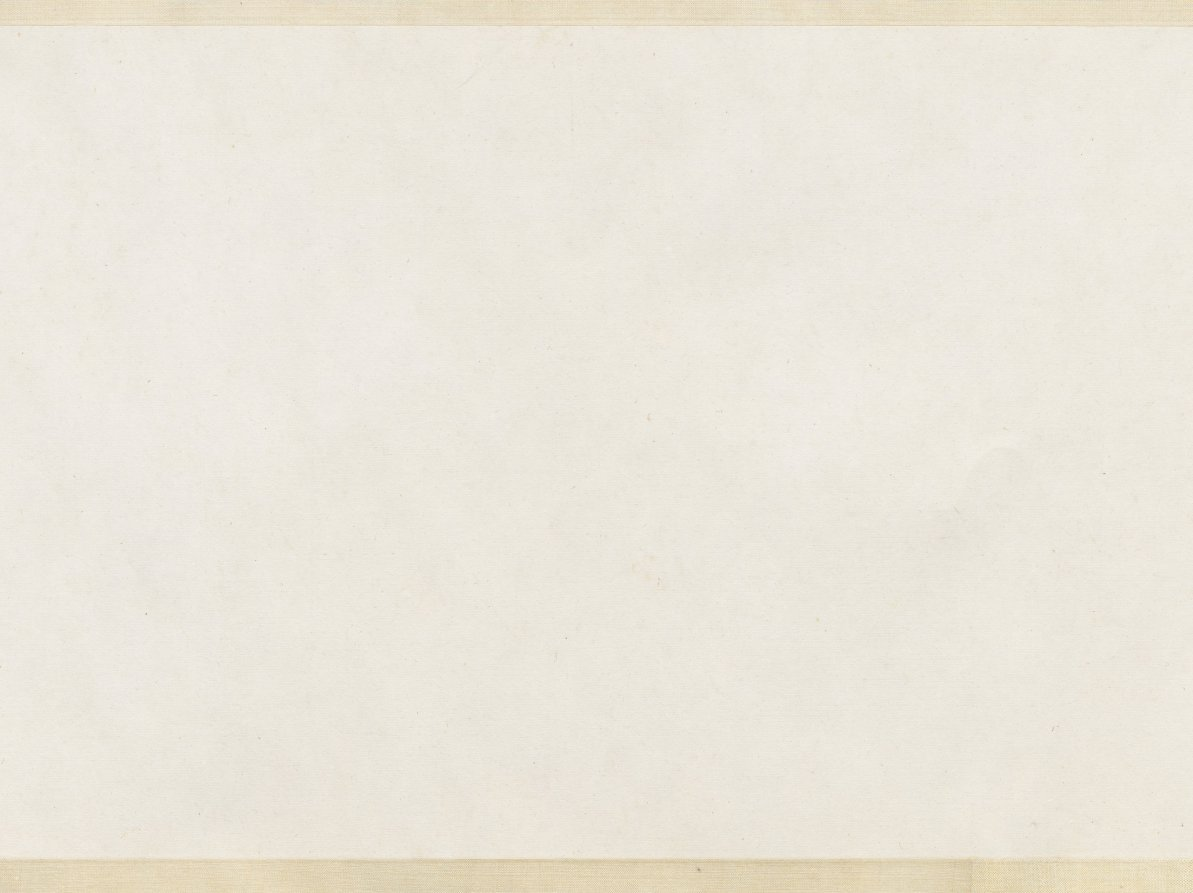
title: Sericulture (The Process of Making Silk)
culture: China, Southern Song dynasty (1127-1279)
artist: attributed to Liang Kai (Chinese, mid-1100s–early 1200s)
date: early 1200s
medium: Handscroll; ink and color on silk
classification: Painting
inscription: 3 colophons and 7 seals of Ch'eng Ch'i (20th c.).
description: By the Southern Song period, the economic center of the silk industry had shifted to the lower Yangzi delta, while the north continued to be troubled by wars. Divided into three sections, the handscroll illustrates 14 steps in the process of making silk, from the raising of silkworms to the weaving of silk cloth. The scroll’s scenes follow the illustrations of Lou Shou’s (1090–1162) Pictures of Tilling and Weaving (gengzhi tu), the first recorded painting of this genre, which was conceived in Hangzhou around 1145. However, in the Cleveland painting the artist groups several scenes of sericulture together under the roof of an open structure.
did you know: The painting is attributed to Liang Kai, a court artist active from about 1201 to 1204 at the Imperial Painting Academy in the city of Hangzhou, a major silk weaving center from that time to the present day.